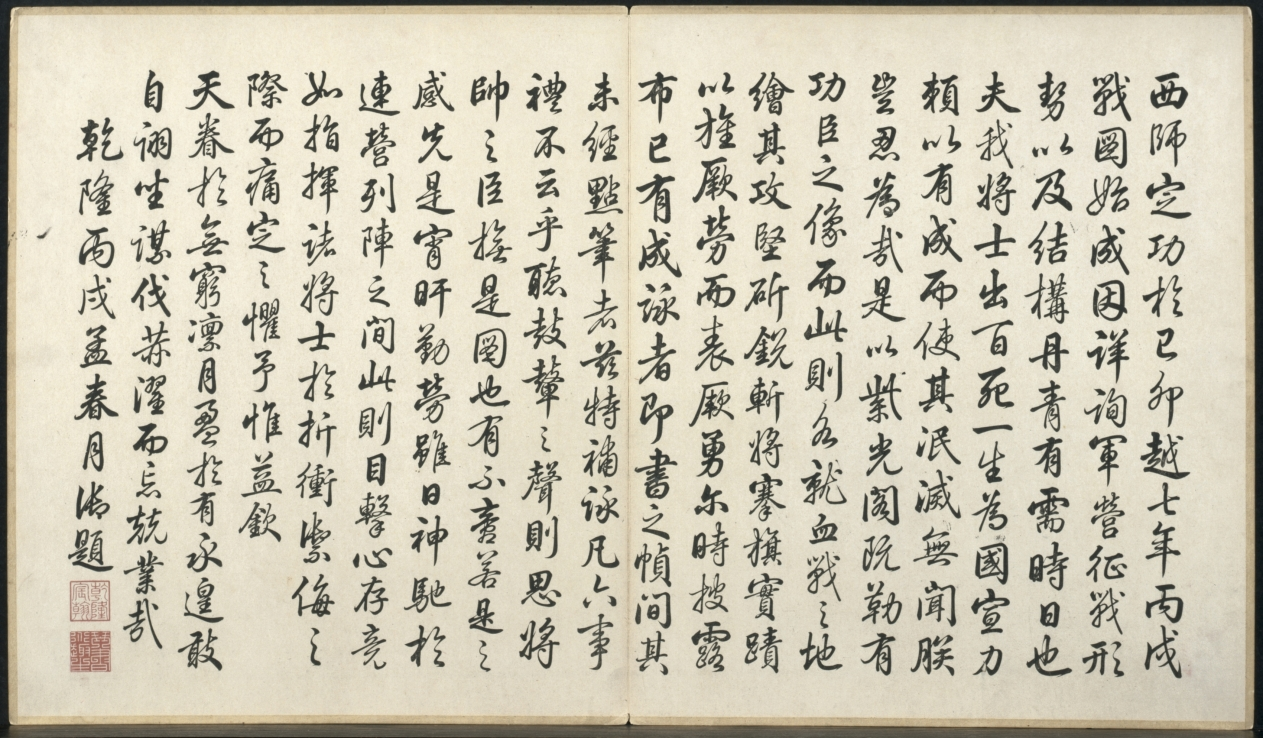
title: Battle Scenes of the Quelling of Rebellions in the Western Regions, with Imperial Poems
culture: China, Qing dynasty (1644–1911), Qianlong reign (1736–95)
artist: Giuseppe Castiglione (Italian, 1688–1766)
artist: Jean Damascene Sallusti (Italian, d. 1781)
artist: Jean Denis Attiret (French, 1702–1768)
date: c. 1765–74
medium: Etchings, mounted in album form, 16 leaves plus two additional leaves of inscriptions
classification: Print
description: This set of etchings was commissioned by Emperor Qianlong to record in pictorial terms the courage of his generals and soldiers in quelling the rebellions in the Western Regions. Qianlong added his own poem to each of the etchings, indicating his appreciation and pride in this demonstration of military might. "Western Regions" refers to the present-day Xingjiang province, often described in Western writing as "Central Asia."